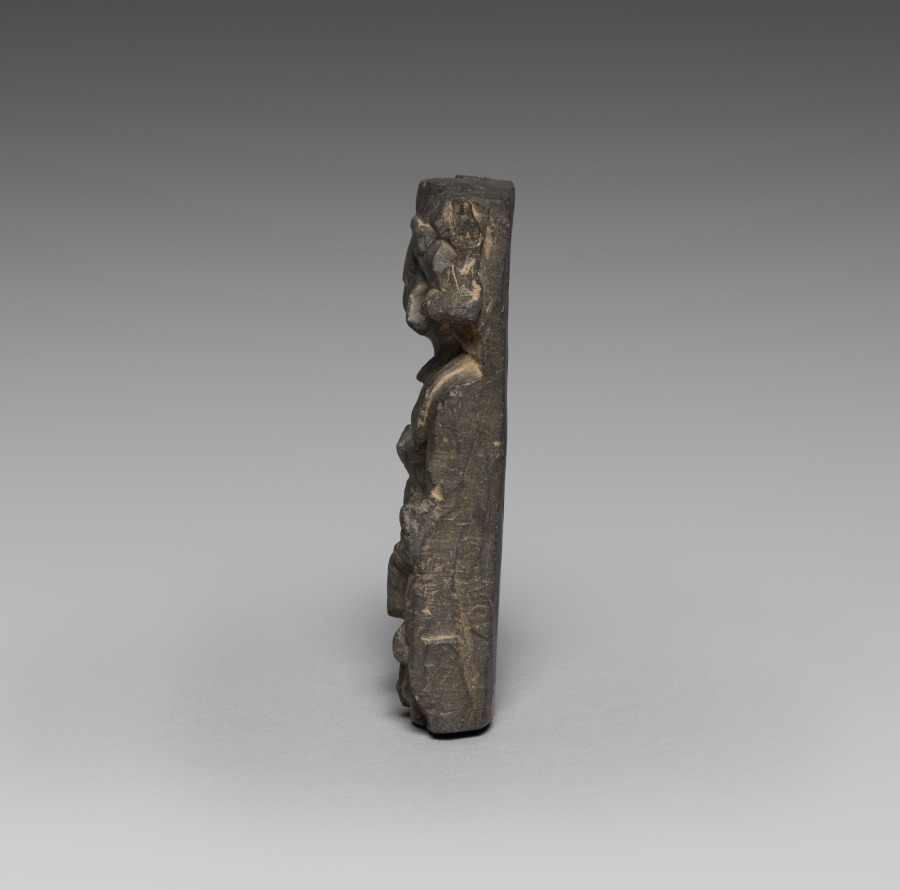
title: Male Figure, Possibly Indra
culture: Pakistan, Gandhara, possibly Swat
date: 300s–400s CE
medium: schist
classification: Sculpture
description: This carving appears to be unfinished, showing only the broad strokes of the male figure. The flat-topped crown is characteristic of Indra, which may be the identity of this figure.